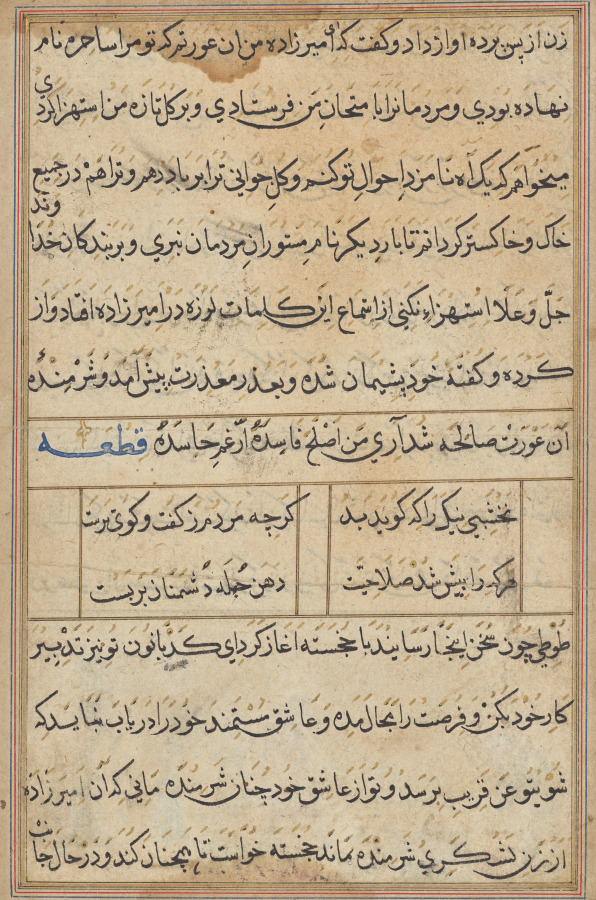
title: Page from Tales of a Parrot (Tuti-nama): text page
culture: Mughal India, court of Akbar (reigned 1556–1605)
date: c. 1560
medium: gum tempera, ink, and gold on paper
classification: Painting